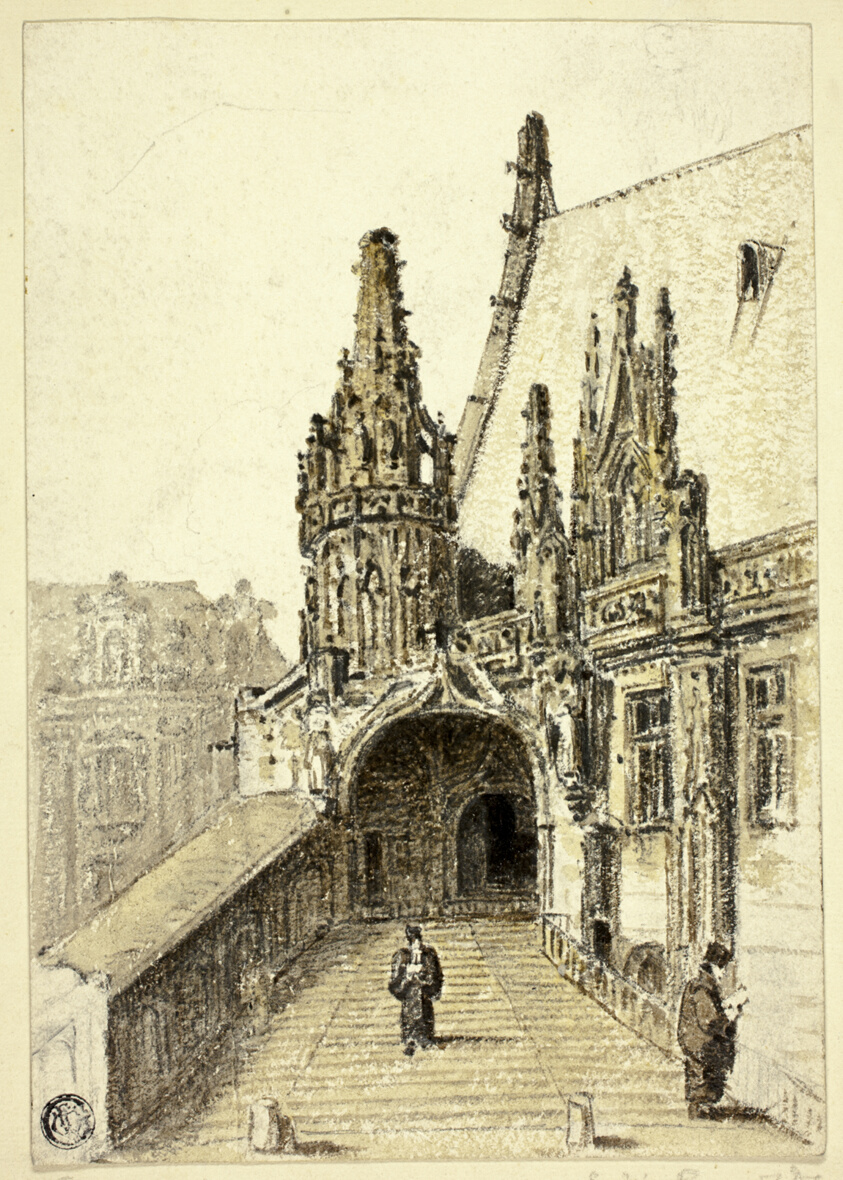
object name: Drawing and Watercolor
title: Palace of Justice, Rouen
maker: Possibly after Frederick Nash (English, 1782-1856); or Samuel William Reynolds, the elder (English, 1773-1835)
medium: Watercolor and graphite, with charcoal, on cream wove paper, tipped onto cream laid paper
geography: England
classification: watercolor; drawings (visual works); prints and drawing